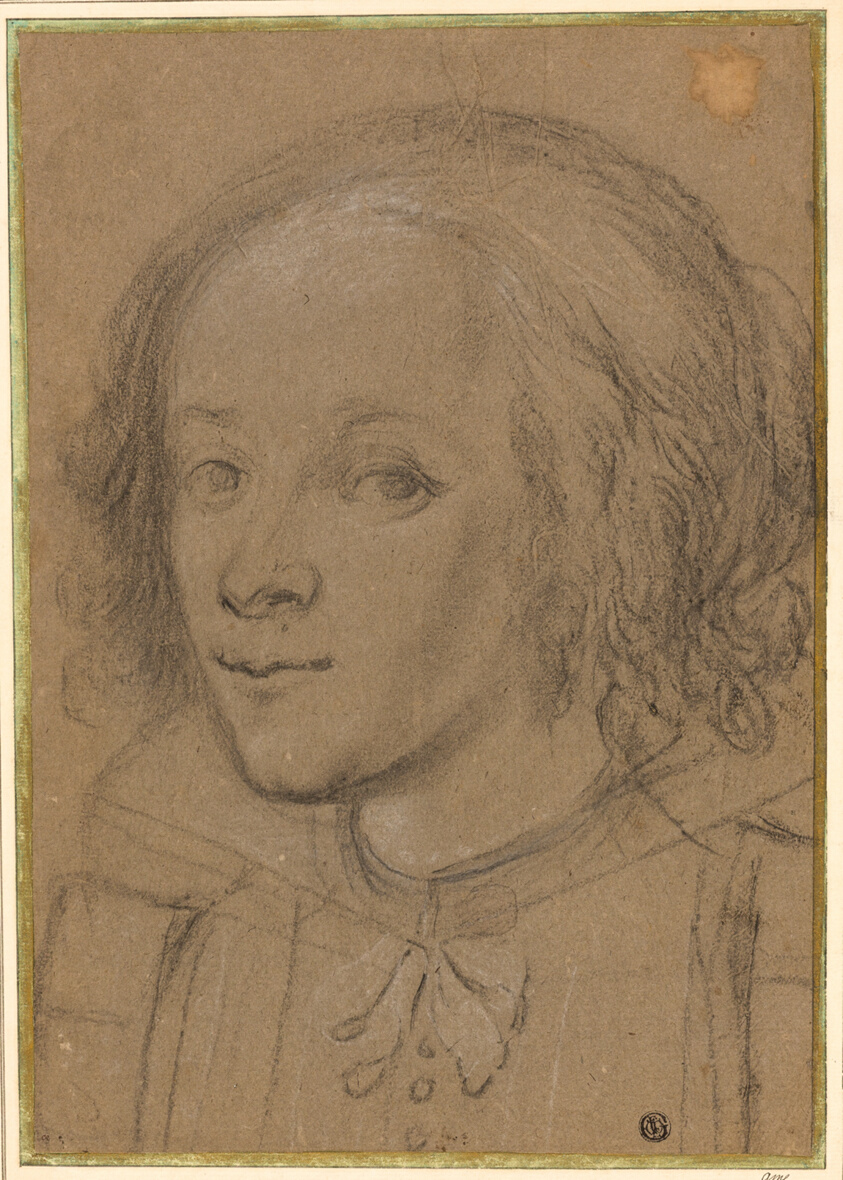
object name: Drawing and Watercolor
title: Portrait of a Young Woman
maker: Unknown Artist; Possibly Spanish, 17th century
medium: Black chalk, heightened with white chalk, on light brown laid paper, laid down on ivory laid paper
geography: Spain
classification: chalk; drawings (visual works); prints and drawing